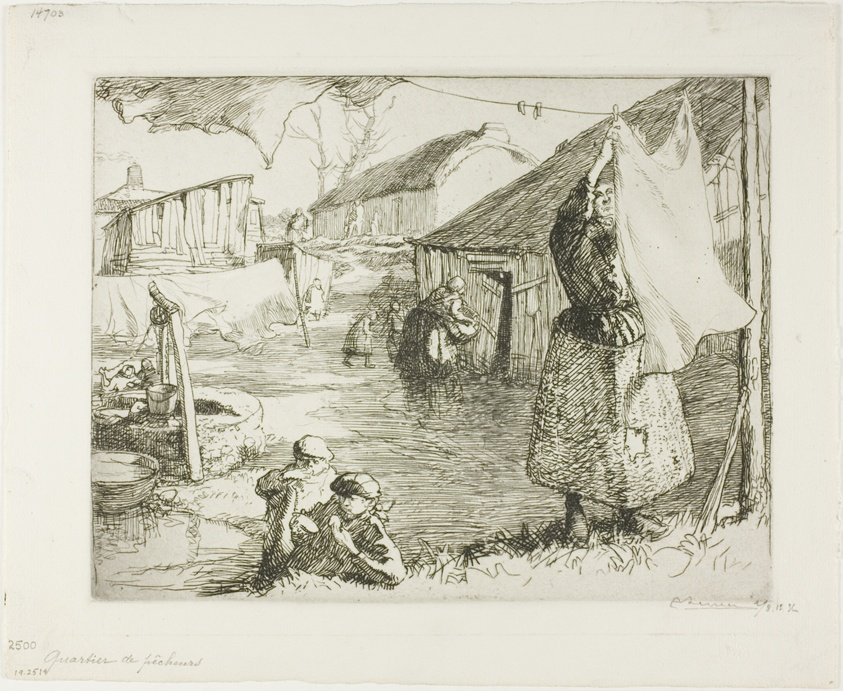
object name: Print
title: Fisherman's Quarter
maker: Louis Auguste Lepère (French, 1849-1918)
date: 1915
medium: Etching on cream laid paper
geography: France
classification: etching; print; prints and drawing